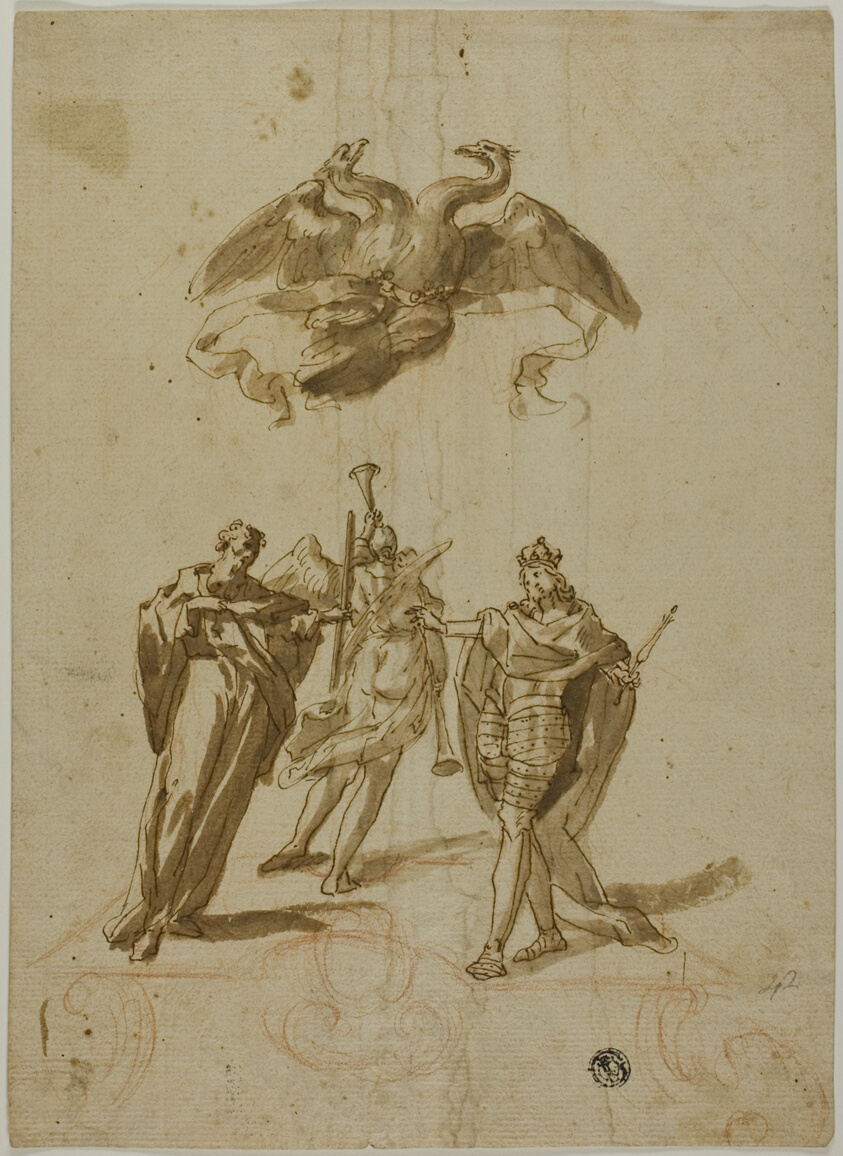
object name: Drawing and Watercolor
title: Allegorical Subject: Two-headed Imperial Eagle on Clouds; On Ground, a Draped Figure, a King and a Figure of Fame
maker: Unknown Artist; Italian, 1500-1599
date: 16th century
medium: Pen and brown wash on paper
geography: Italy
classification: ink or chalk wash; drawings (visual works); prints and drawing